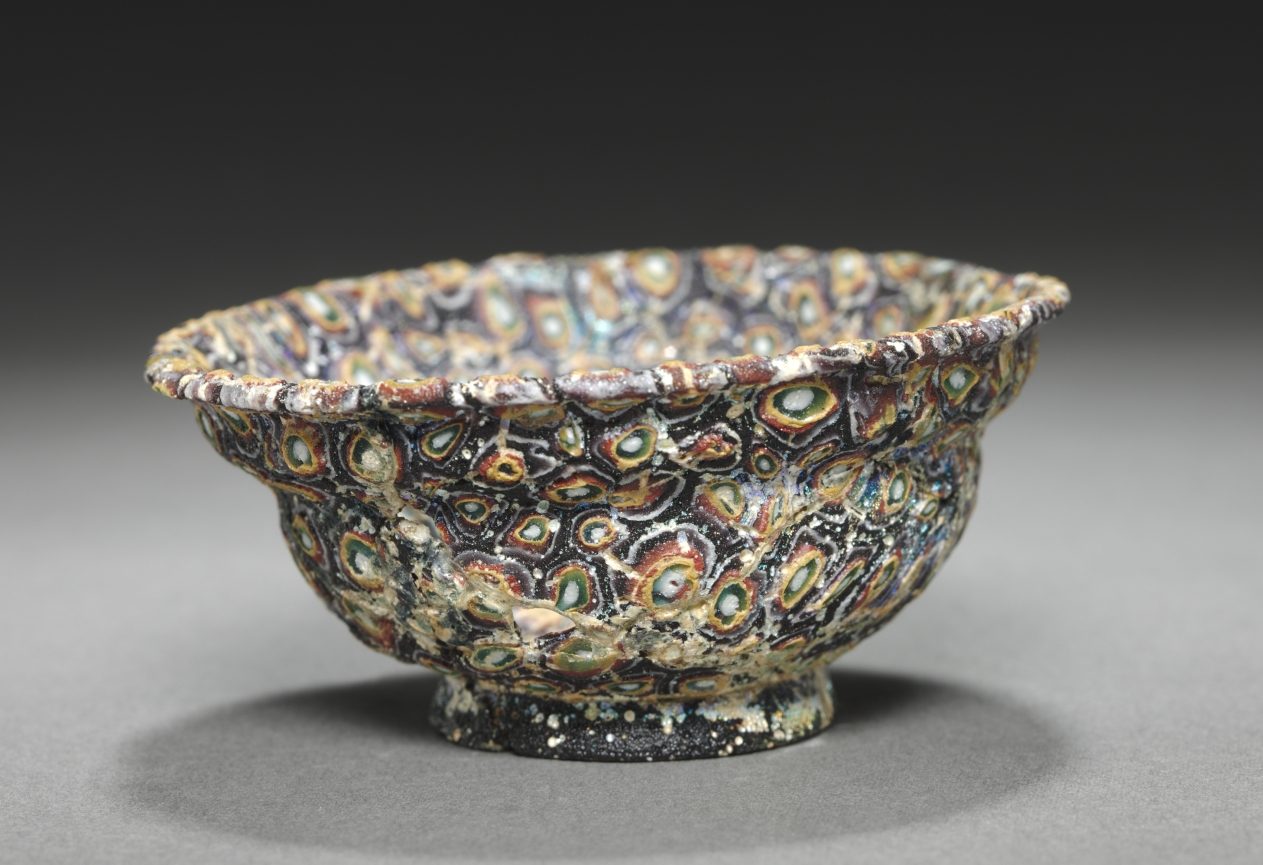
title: Millefiori Bowl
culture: Italy, Roman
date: 1–100 CE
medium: glass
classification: Glass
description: Mosaic glass, also called millefiori, was cast in a two-part mold. Fused glass rods of different colors were bundled together into patterns, then sliced into disk-shaped cross sections. These were placed within the mold and heated until fused. After cooling, the vessel’s surface was fire- or wheel-polished.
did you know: Millefiori, Italian for “thousand flowers,” describes the ancient glass-making technique later revived by Venetian artisans.